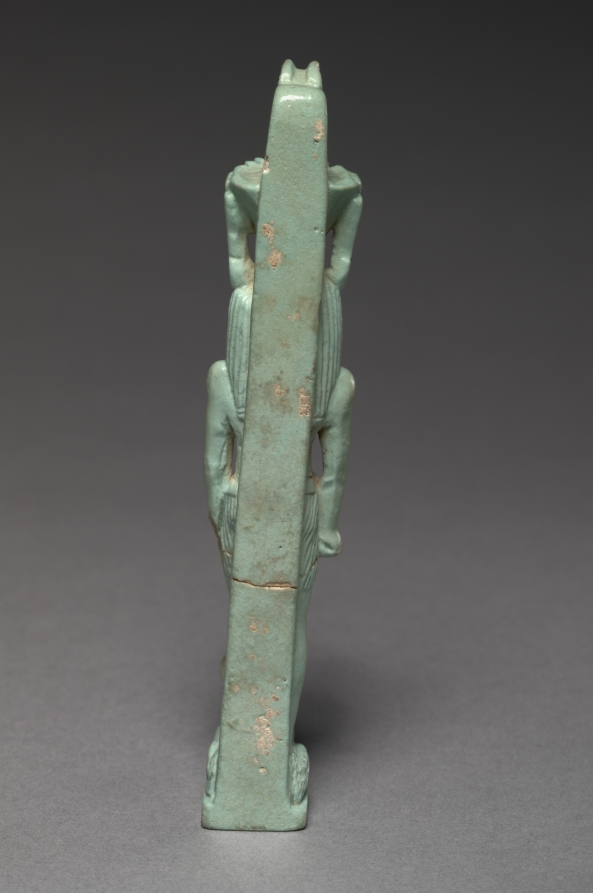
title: Amulet of Nefertem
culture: Egypt, Late period (715–332 BCE), Dynasties 27–30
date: 525–343 BCE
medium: faience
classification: Amulets